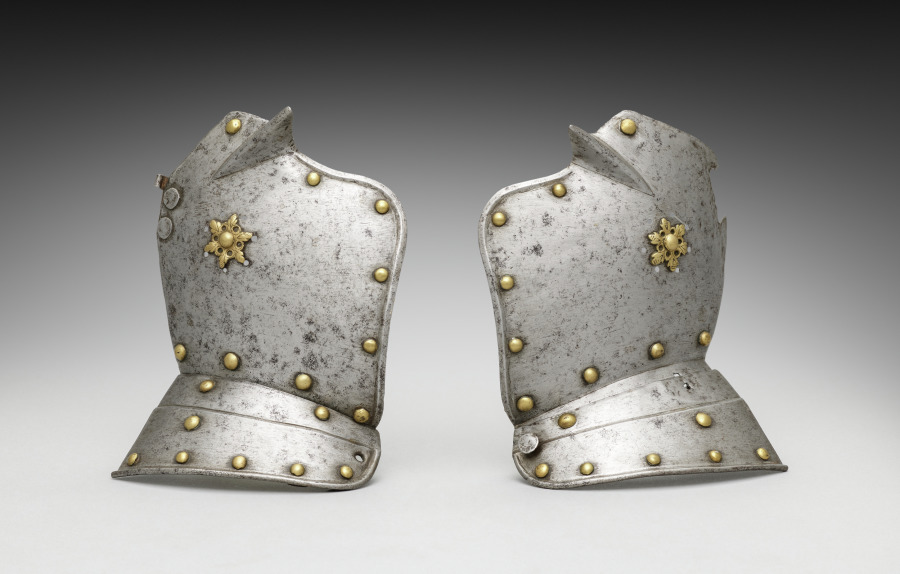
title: Ear Pieces of a Helmet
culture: Germany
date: 1500s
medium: steel, brass headed rivets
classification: Arms and Armor